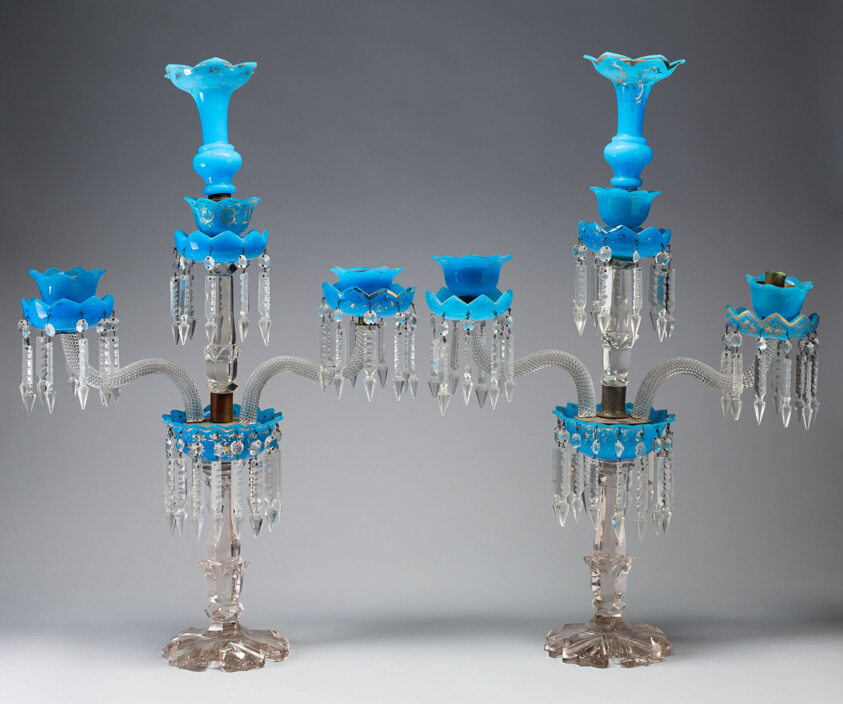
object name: Glass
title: Two Candelabra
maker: France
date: c. 1835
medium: Glass with gilt metal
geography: France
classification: candleholder - candelabra; candleholder; glass; european decorative arts